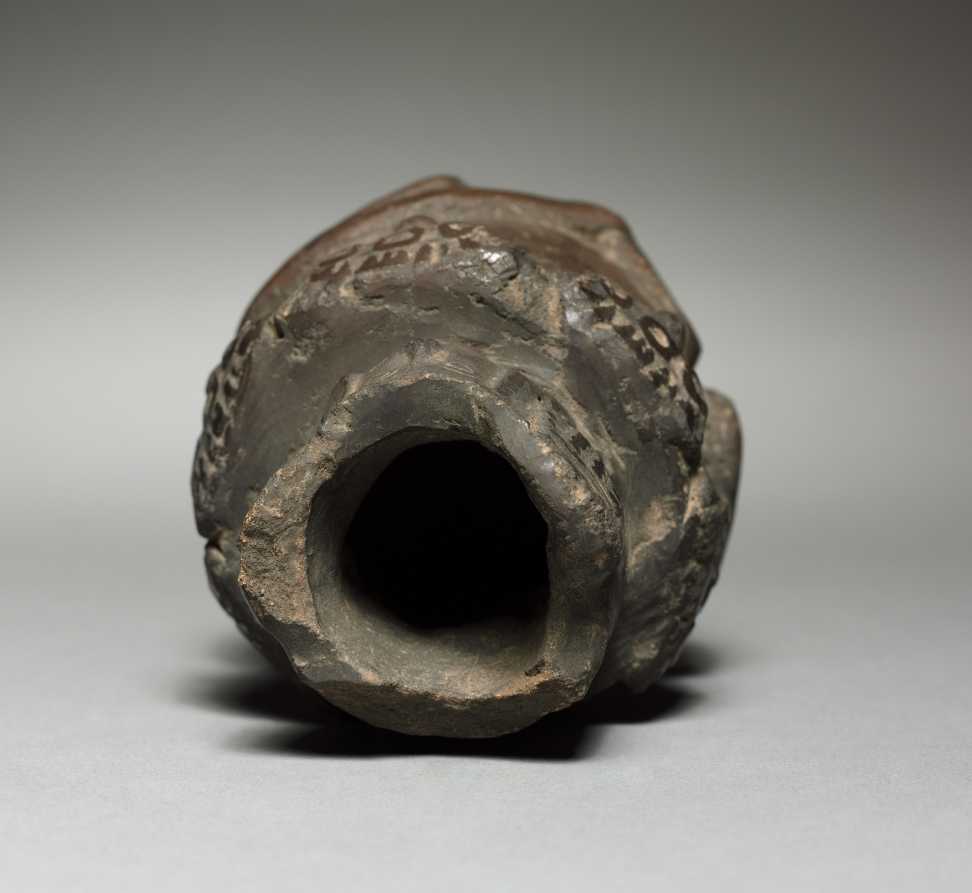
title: Vase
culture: Peru, Tiwanaku style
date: 800–200 BCE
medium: pottery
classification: Ceramic